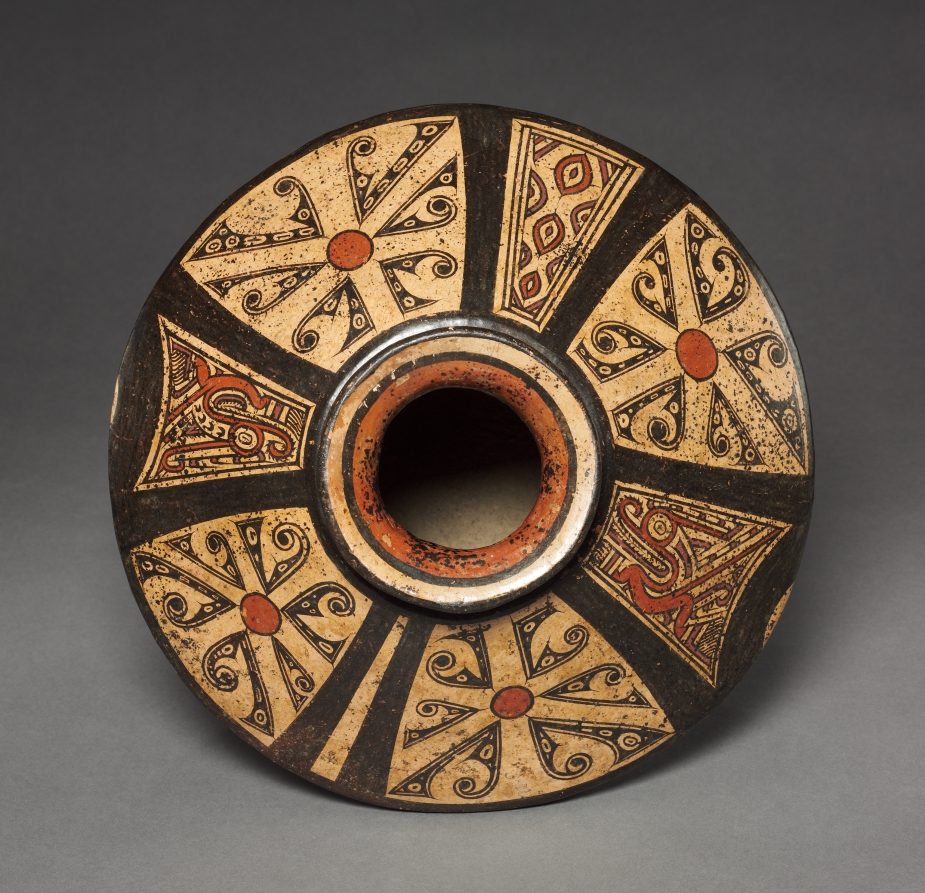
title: Vessel: Turtle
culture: Panama, Parita style, 11th-14th century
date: 1000–1300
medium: ceramic, slip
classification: Ceramic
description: Many Panamanian ceramics are among the most handsome and deftly designed in the Americas. Note how cleverly the artist used the vessel shape to imitate a turtle's carapace, its head peering out from its shell, its feet painted on the back (no. 10). And the stingray floats atop its pedestal, as though gliding through water (no. 9). Lamentably, little is known about the meaning of these witty ceramics.